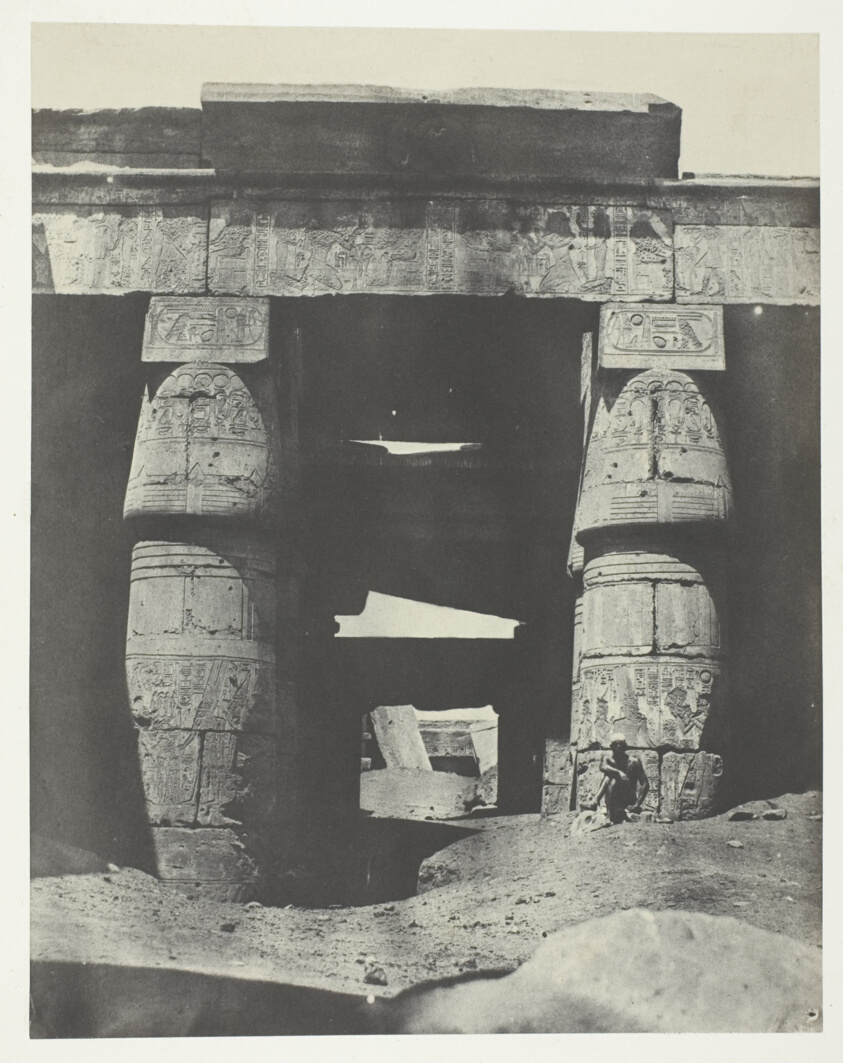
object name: Photograph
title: Karnak, Portique du Temple de Khons; Thèbes, plate 29 from the album "Egypte, Nubie, Palestine et Syrie" (1852)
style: 19th century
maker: Maxime Du Camp (French, 1822–1894)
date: 1849/51, printed 1852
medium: Salted paper print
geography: France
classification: salted paper print; photographic process; photography; photograph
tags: Collected by Hugh Edwards, Egypte, Nubie, Palestine et Syrie